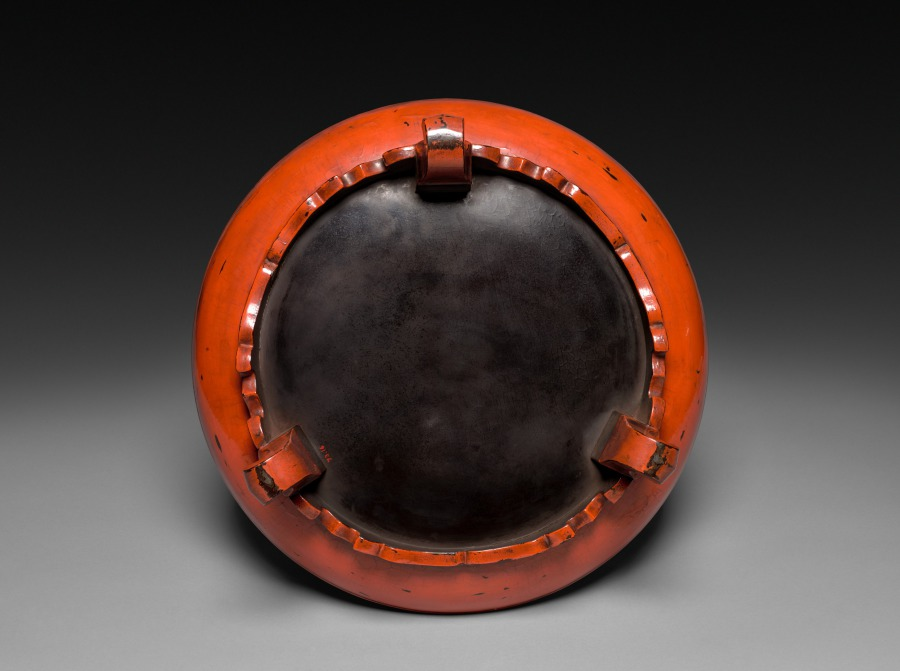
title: Tray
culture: Japan, Muromachi period (1392–1573)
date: 1392–1573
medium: Negoro lacquer on wood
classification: Lacquer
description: Negoro is a lacquer technique (named after the Negoro temple in Japan) in which several layers of red lacquer are applied over a black lacquer undercoating. Through years of handling, a natural surface of red and black random patterns results.